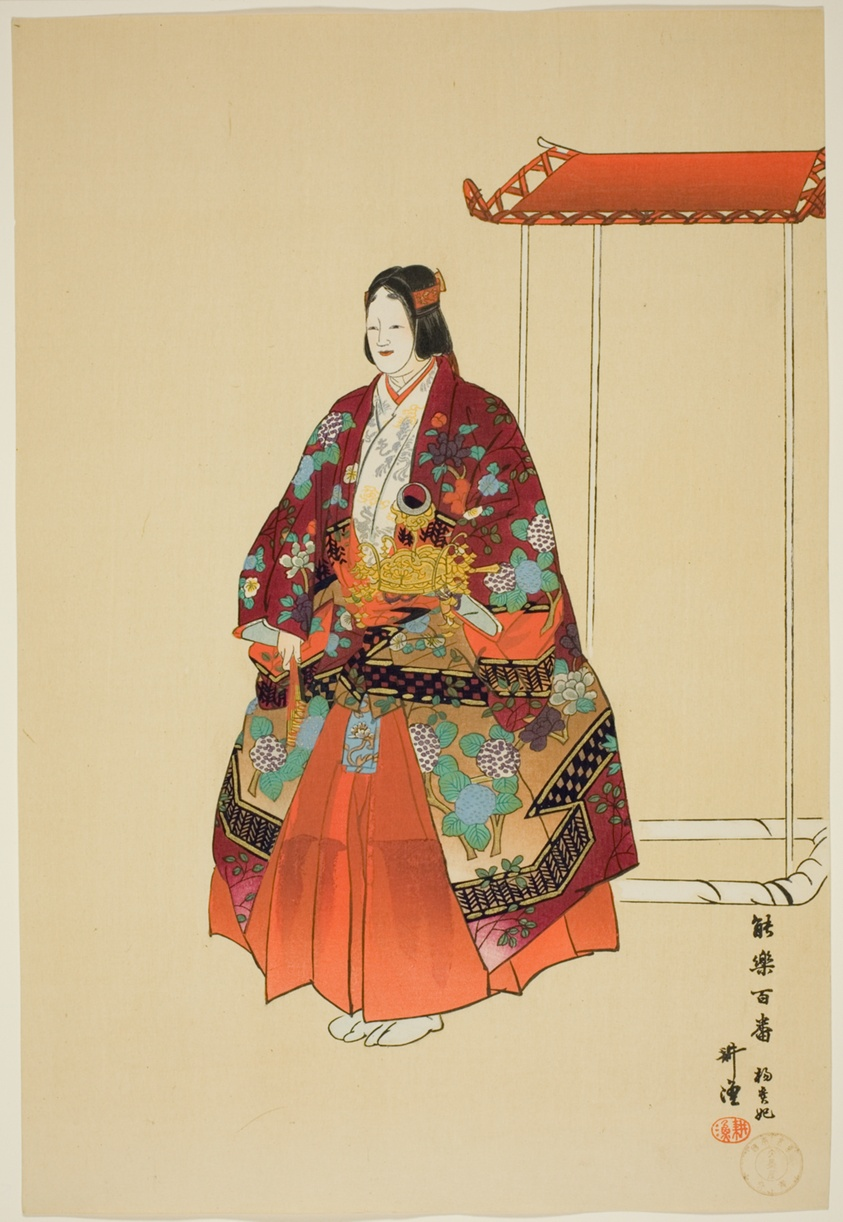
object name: Print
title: Yokihi, from the series "One Hundred No Dramas (Nogaku hyakuban)"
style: Japanese (culture or style)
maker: Tsukioka Kogyo; Japanese, 1869-1927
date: 1898/1903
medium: Color woodblock print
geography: Japan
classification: woodblock print; print; asian art